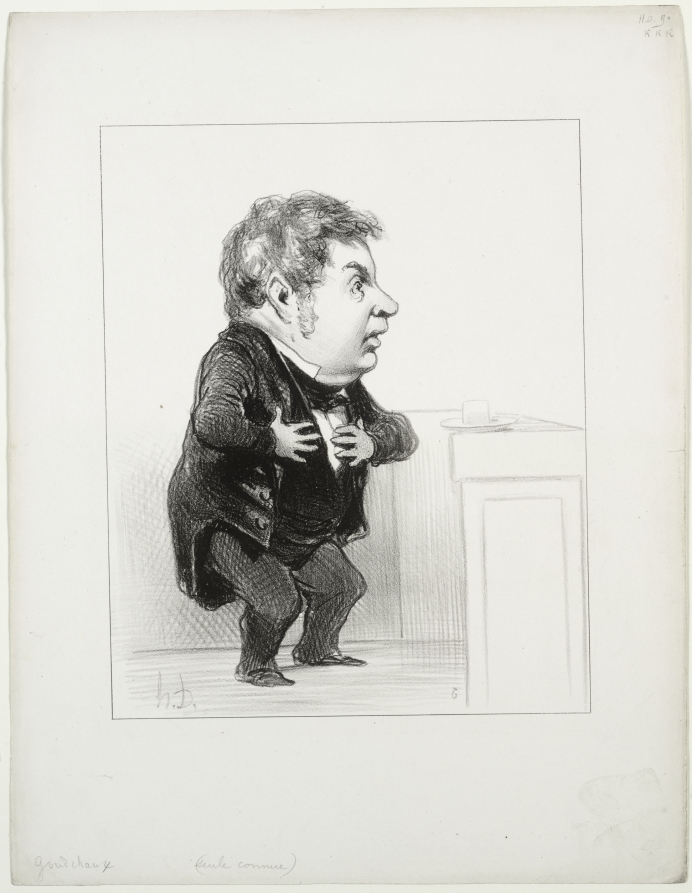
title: Michel Goudchaux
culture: France, 19th century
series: The Representatives Represented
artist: Honoré Daumier (French, 1808–1879)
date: 1849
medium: lithograph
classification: Print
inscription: Upper margin, pencil: HD. 90 / RRR ; lower margin, pencil: Goudchaux (seule connue) ; verso, in pencil: no 6-c / Michel Goudchaux, né à Nancy le 18 mars 1797 ; museum stamp ; black stamp: BLISS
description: This rare print was intended for the series The Representatives Represented but was never published.